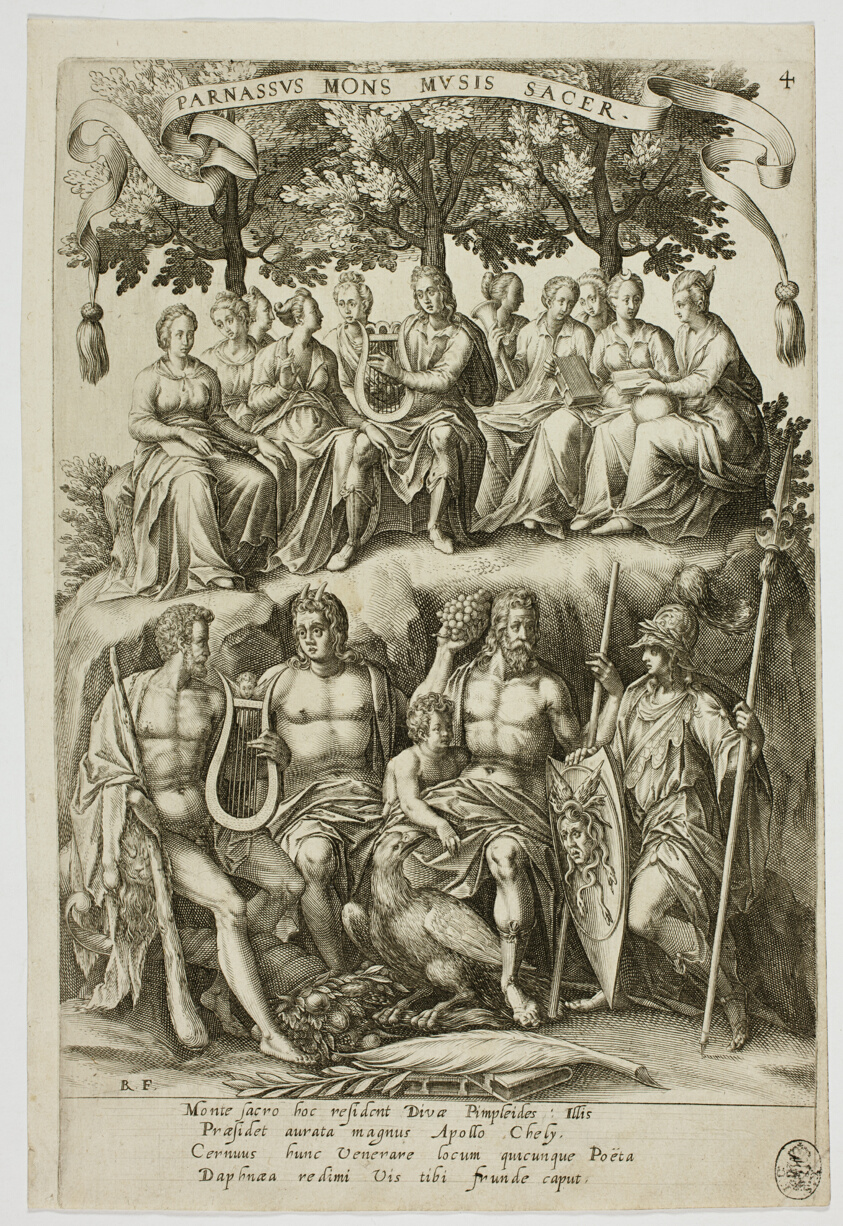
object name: Print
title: Parnassus, plate 4 from Parnassus Biceps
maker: Robert Boissard (French, c. 1570–after 1597); after Jean-Jacques Boissard (French, 1533-1598)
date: 1601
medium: Engraving in black on ivory laid paper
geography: Frankfurt an der Oder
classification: engraving; print; prints and drawing